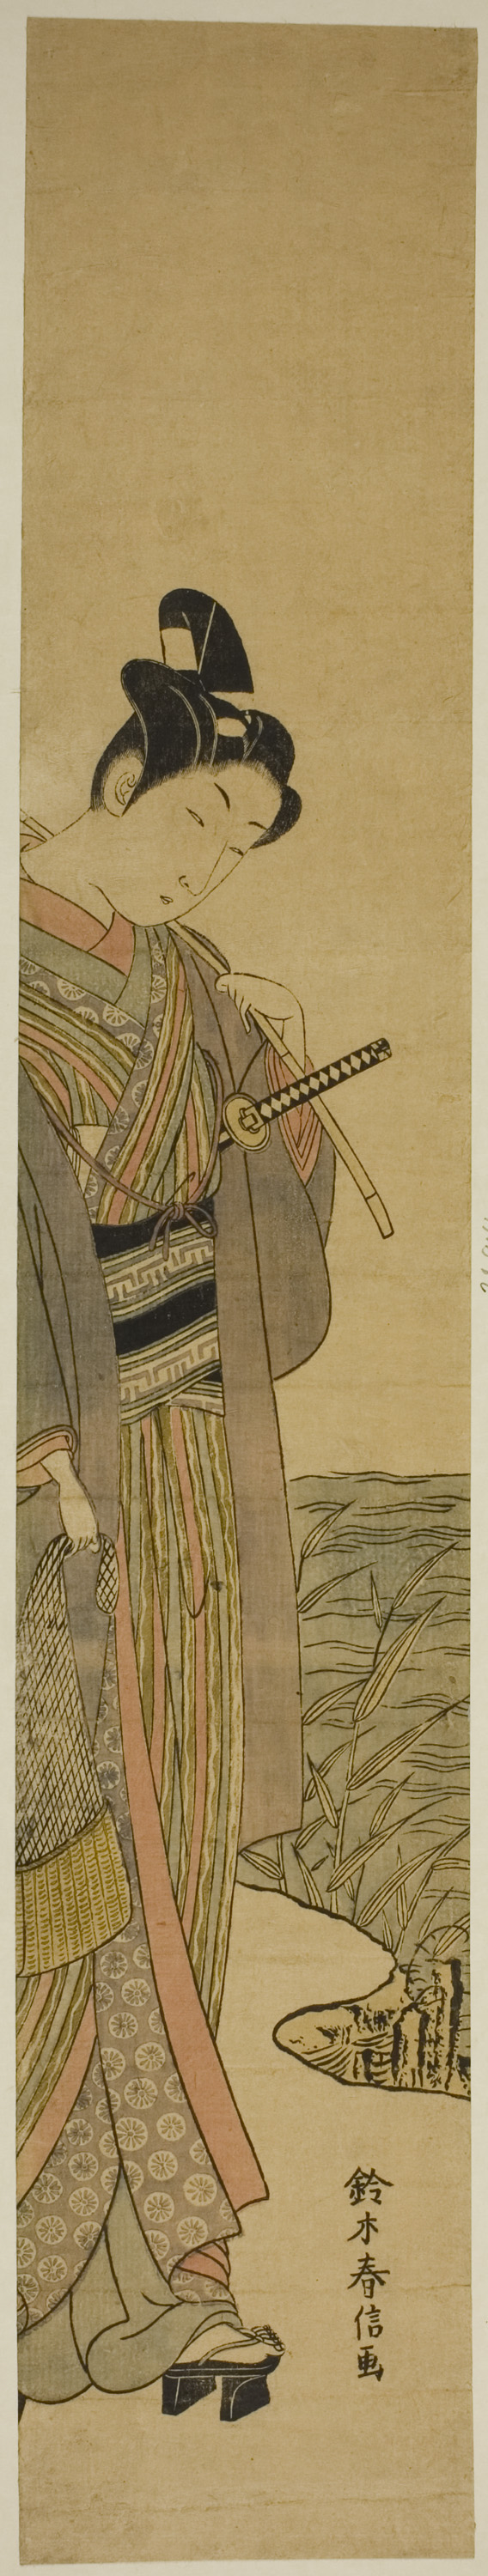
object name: Print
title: Young Man with Fishing Pole and Net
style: Japanese (culture or style)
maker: Suzuki Harunobu 鈴木 春信; Japanese, 1725 (?)-1770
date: c. 1769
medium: Color woodblock print; hashira-e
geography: Japan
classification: woodblock print; print; asian art